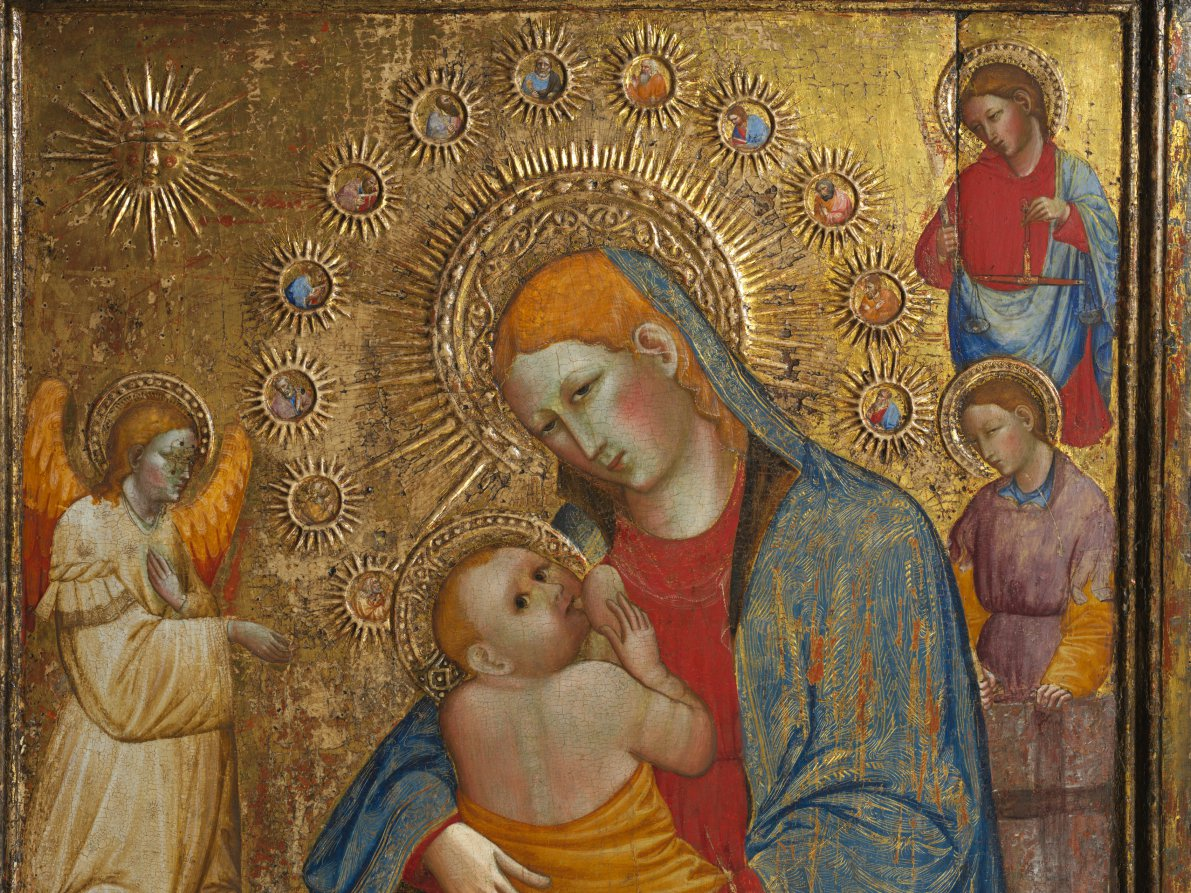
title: The Madonna of Humility with the Temptation of Eve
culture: Italy, the Marches, late 14th-early 15th Century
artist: Olivuccio di Ciccarello (Italian, Marche, 1360/65–1439)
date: c. 1400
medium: tempera and gold on wood panel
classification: Painting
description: The Madonna is seated humbly on the ground nursing her child. Saint George and the Archangels Gabriel and Michael kneel nearby, while Christ’s disciples appear radiating from the Madonna’s halo in the form of stars. In contrast with the Virgin’s purity, Eve lies in the lower part of the painting. Coaxed by the serpent, she raises the forbidden fruit to her mouth, thus condemning humankind through her original sin. The juxtaposition of these two images affirms the Incarnation and the role of Christ and the Virgin in the redemption story. The deep scratches on the surface of the panel, especially on the serpent’s face and Eve’s wrist, likely resulted from a zealous Christian’s symbolic attack on the power of evil. The artist, Olivuccio di Ciccarello, is known to have been active in the Marche in central Italy. Little is known of his life except that he was an important and prolific painter in Ancona, where he died. His paintings were formerly attributed to Carlo da Camerino, an apparently nonexistent artist, on the basis of a mistaken reading of his signature on a crucifix.